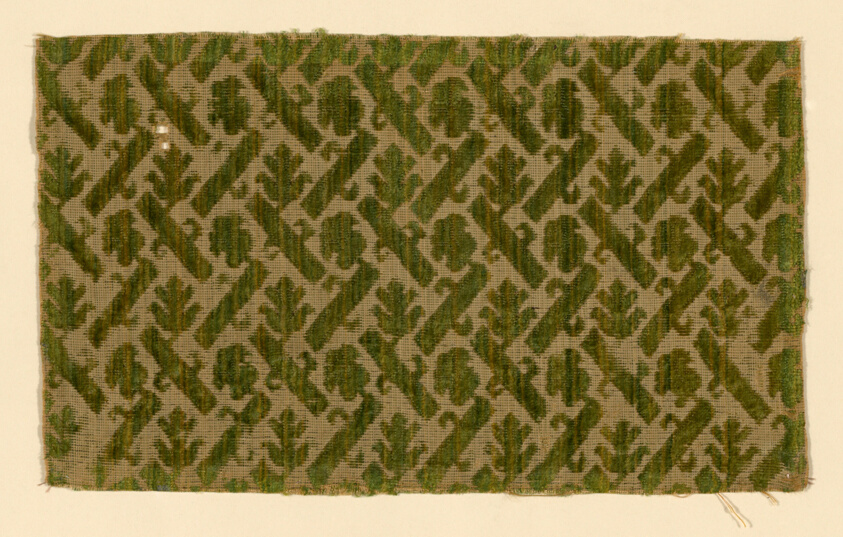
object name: Textile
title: Fragment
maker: Italy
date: First half 17th century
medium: Cisele voided cloth velvet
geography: Italy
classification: textile; weaving - velvet